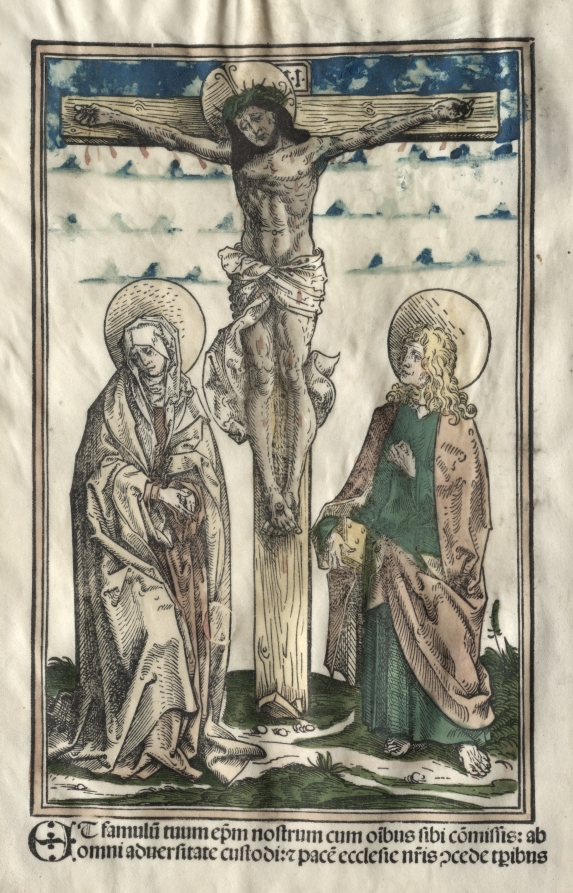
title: Christ on the Cross between Mary and John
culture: Germany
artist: Hans Burgkmair (German, 1473–1531)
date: 1502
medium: woodcut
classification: Print